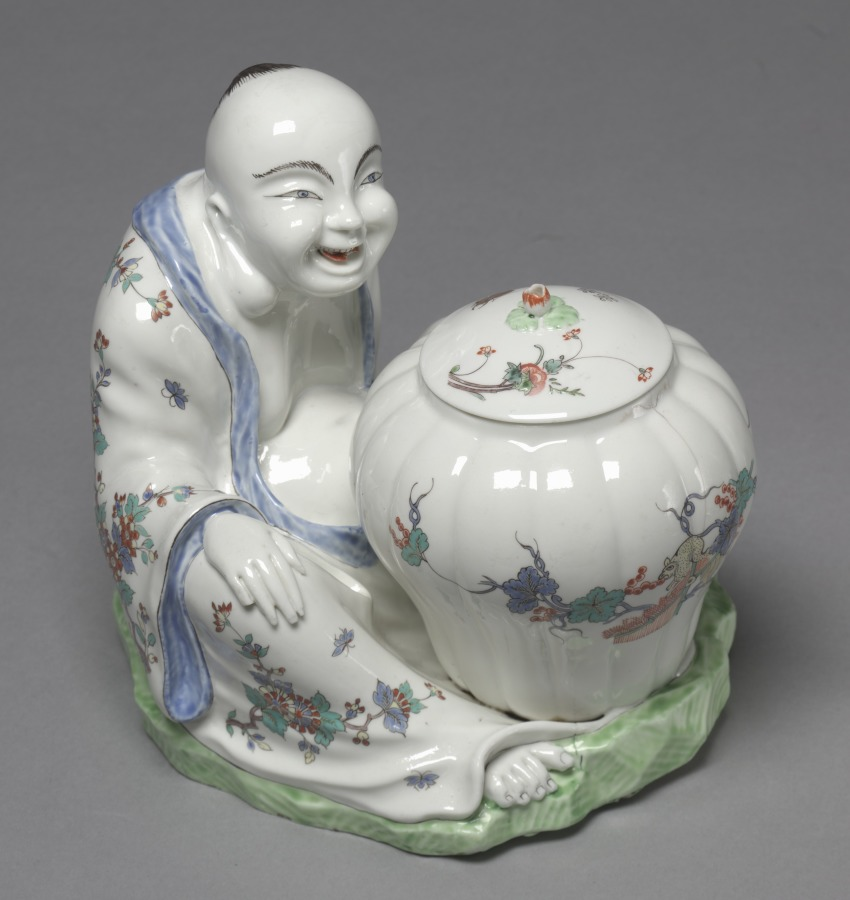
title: Figure of Budai or Hotei with Jar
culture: France, Chantilly, 18th century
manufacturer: Chantilly Porcelain Factory (French)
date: c. 1735–40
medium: Tin-glazed soft-paste porcelain with enamel decoration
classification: Ceramic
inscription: [Mark of the Chantilly factory (red hunting horn), on bottom]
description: The production of decorative figures like this one, referred to as magots or pagodes in European texts, was the result of an 18th-century European interest in Chinese and Japanese culture and porcelain. Budai, pronounced Hotei in Japanese, was a semilegendary Chinese monk known in Japan through the transmission of Chan Bhuddism. This figure’s decoration with multicolor overglaze enamels on a milky-white is typical of Japanese Kakiemon style.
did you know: In 1735, the Chantilly factory was given a 25-year royal privilege for the manufacture of objects that imitated Japanese porcelain.